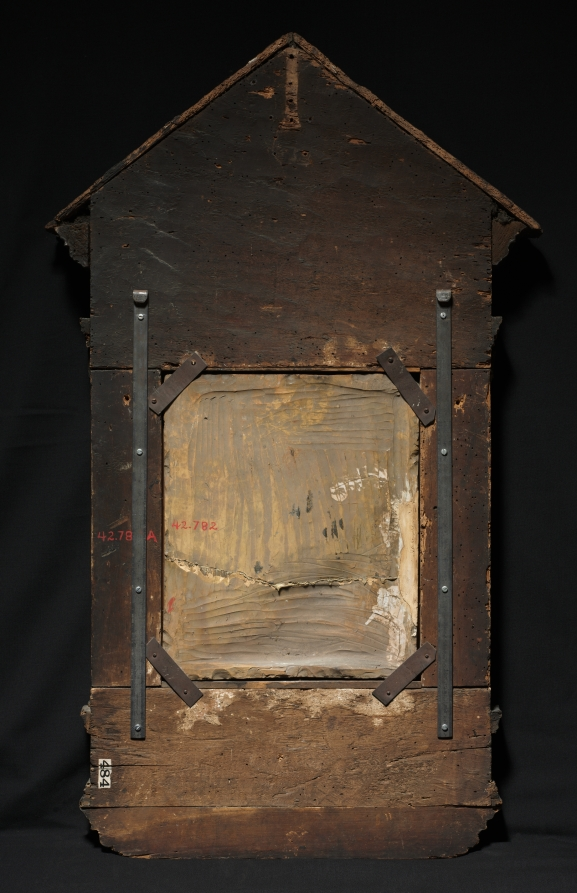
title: Madonna and Child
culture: Italy, 15th century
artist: Luca della Robbia (Italian, 1400?–1482)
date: c. 1460–1470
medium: glazed terracotta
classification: Sculpture